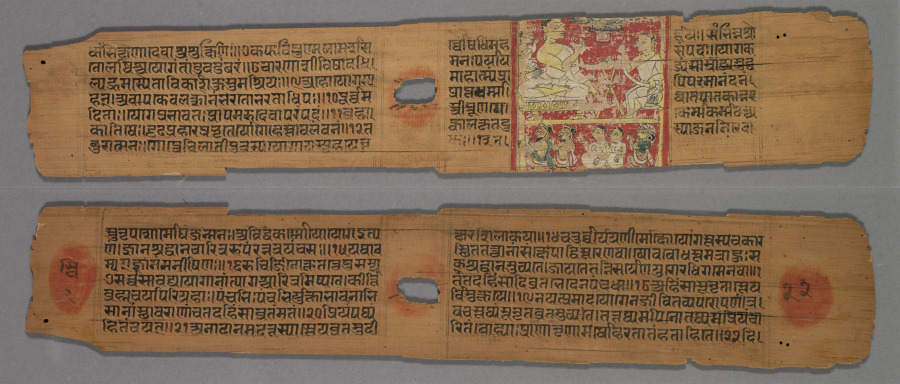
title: Folio 22 from a Yoga-shastra of Hemachandra: Jain Monk with disciple and two laymen, two Nuns, and a laywoman (recto); Text (verso)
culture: Western India, Gujarat, 13th century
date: c. 1275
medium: Gum tempera and ink on palm leaf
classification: Painting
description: This painting, from later in a Sanskrit text on yoga and meditation, shows the transmission of the teaching. The senior monk on a throne, who may also be the text’s author, faces a disciple with a sacred book on a stand under a canopy between them. Below is a pious assembly of lay followers and nuns.